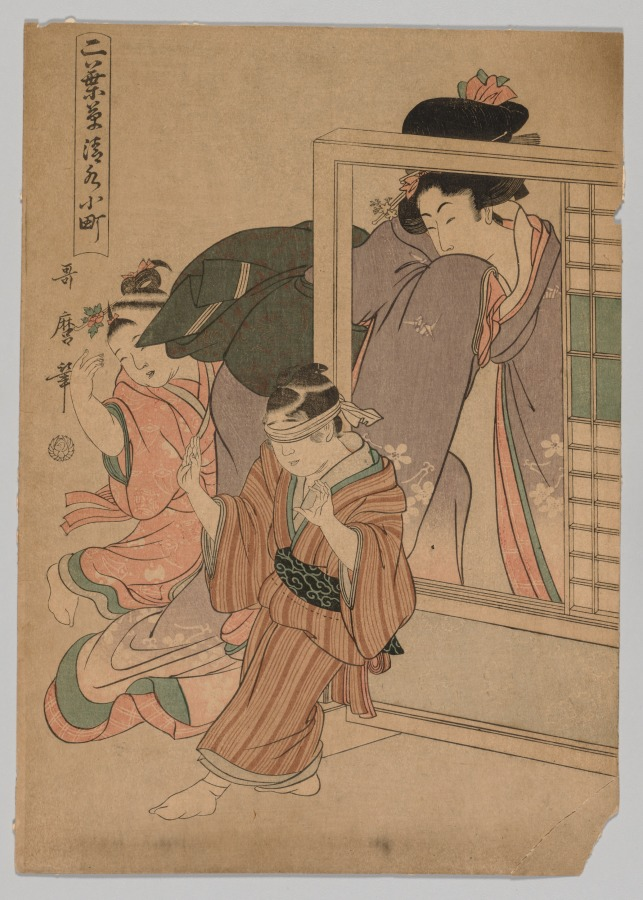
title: Kiyomizu Komachi from the series Little Seedlings: Seven Komachi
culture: Japan, Edo period (1615–1868)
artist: Kitagawa Utamaro (Japanese, c. 1754–1806)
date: c.1803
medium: color woodblock print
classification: Print